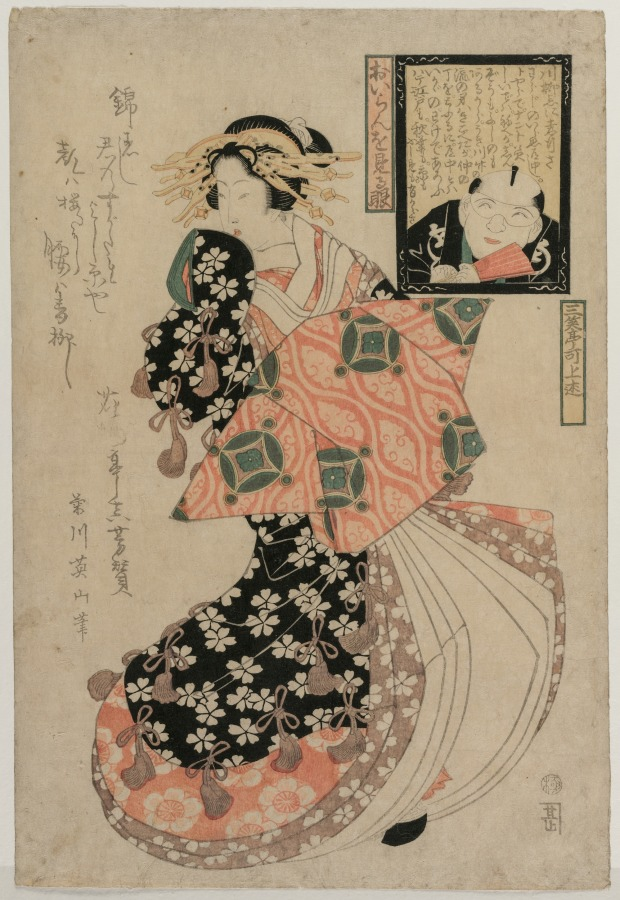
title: Eyes for Looking at a Courtesan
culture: Japan, Edo period (1615–1868)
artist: Kikukawa Eizan (Japanese, 1787–1867)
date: c. 1810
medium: color woodblock print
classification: Print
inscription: Signature: Kikugawa Eizan hitsu Seal: Unidentified circular black seal on verso